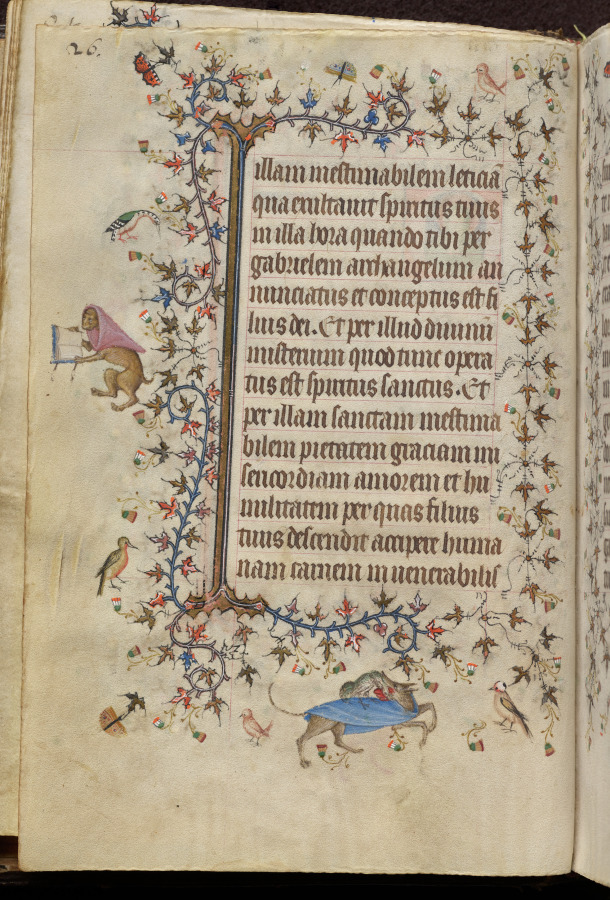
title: Hours of Charles the Noble, King of Navarre (1361-1425): fol. 13v, Text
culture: France, Paris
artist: Master of the Brussels Initials and Associates (French)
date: c. 1405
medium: ink, tempera, and gold on vellum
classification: Bound Volume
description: This precious volume was obviously highly prized by its owner, the French-born King of Navarre, who had his coat of arms painted on no less than twenty folios. Rather than directly commissioning this manuscript from a specific workshop, it seems that Charles the Noble acquired his book of hours -- perhaps ready-made for the luxury market -- while on a trip to Paris in 1404-05. A collaborative effort, six painting styles are evidenced within the pages of this codex, those of two Italians, two Frenchmen, and two Netherlanders. The painter who was responsible for the planning and decoration of the book, and who produced seventeen of the large miniatures, was a Bolognese artist known as the Master of the Brussels Initials. His principal assistant, responsible for most of the borders, was a Florentine who signed his name "Zecho" da Firenze on folio 208 verso.